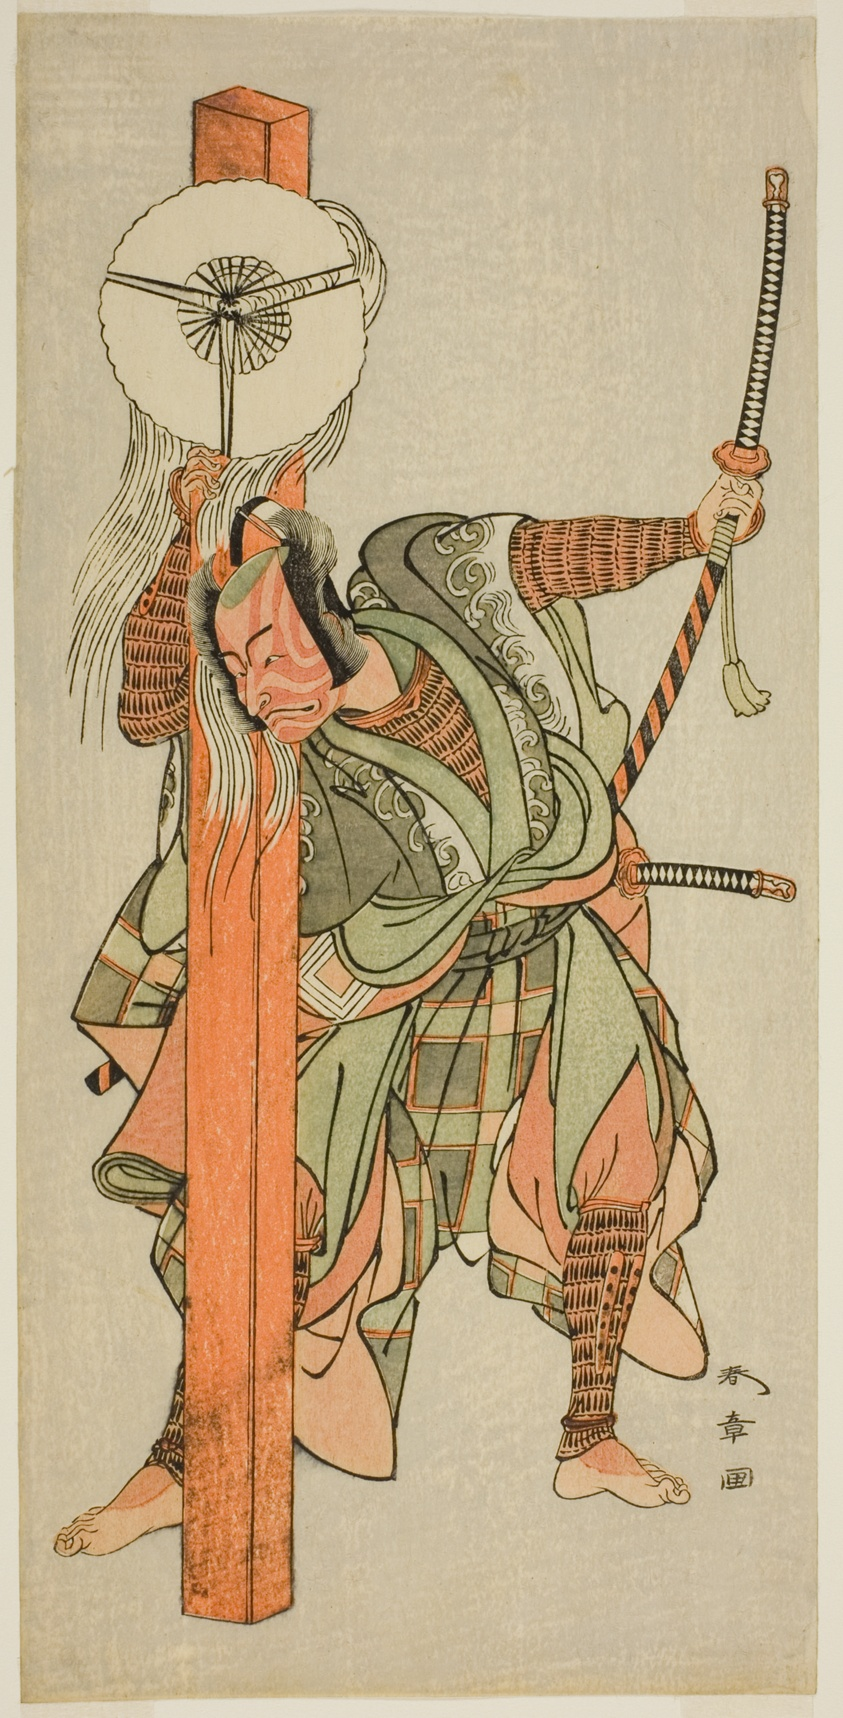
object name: Print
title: The Actor Ichikawa Danjuro V as Atomi no Ichii in the Play Miya-bashira Iwao no Butai, Performed at the Morita Theater in the Seventh Month, 1773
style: Japanese (culture or style)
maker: Katsukawa Shunsho 勝川 春章; Japanese, 1726-1792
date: c. 1773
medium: Color woodblock print; hosoban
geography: Japan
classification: woodblock print; print; asian art